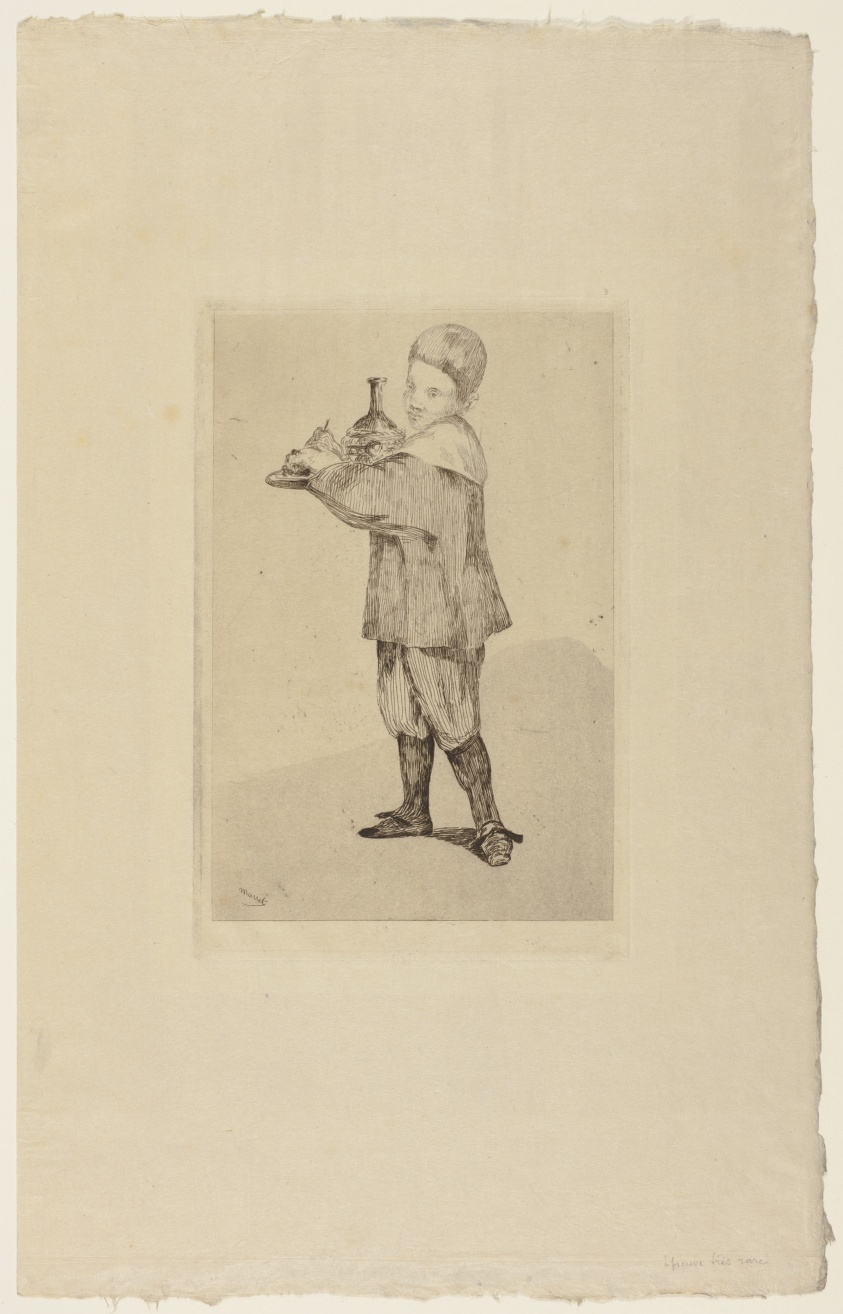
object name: Print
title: The Boy Carrying a Tray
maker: Édouard Manet (French, 1832-1883)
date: 1862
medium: Etching and aquatint in black on cream Japanese paper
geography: France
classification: etching; print; prints and drawing